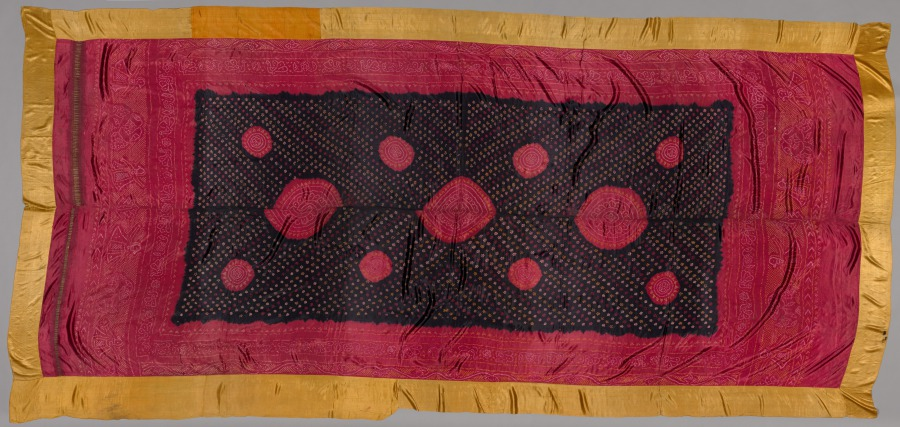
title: Indian Textile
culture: India, 19th - early 20th century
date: 1800s - early 1900s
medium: satin, tied and dyed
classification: Textile